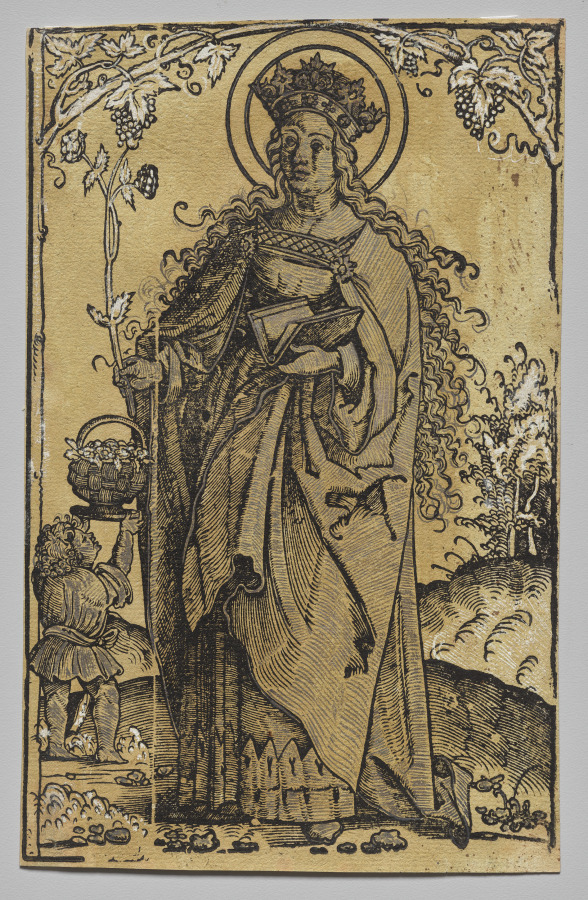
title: Saint Dorothy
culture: Germany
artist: Hans Springinklee (German, 1540)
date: c. 1519–20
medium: Woodcut printed in black oil-based ink and hand colored with ochre wash, heightened with white, silver, and touches of gold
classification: Print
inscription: Verso: inscribed in ink, center: 8; inscribed in graphite, left: Dürer 520 / Pas 263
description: This deceivingly simple print is a work of printmaking history. To create the golden color of the sheet, the paper was washed with an ochre-colored paint over which the black lines were printed. An artist then embellished the cloak and crown of the saint with silver and gold and other areas with white. On the left side of the print, the child, basket, and thistle held by Saint Dorothy are all contained within a vertical line. This indicates where a part of the block was removable, so that another block featuring different attributes (and thus re-assigning the identity of the female saint) could be inserted and printed. The print’s potential re-purposing shows the popularity of prints, many of which were inserted into prayer books in Renaissance Germany.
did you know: The linear shading on the cloak of this saint was applied with ink containing silver, which has tarnished over time.